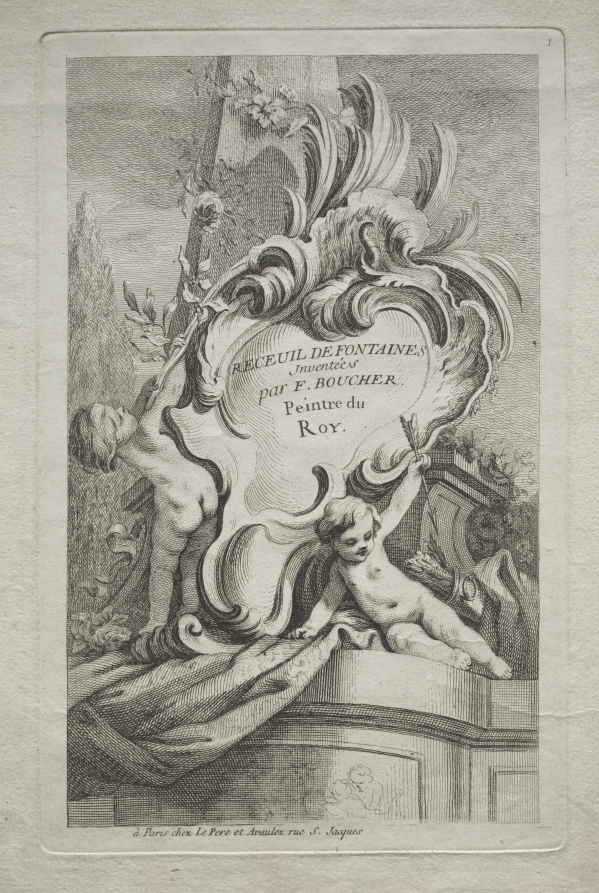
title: No. 1: Title Page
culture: France, 18th century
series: Book of Fountains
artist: Gabriel Huquier (French, 1695–1772)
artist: after François Boucher (French, 1703–1770)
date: c. 1736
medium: etching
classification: Print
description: Boucher was one of the most prolific designers of ornament prints. With their aquatic motifs and gracefully curving and scalloped forms, these designs for fantastic, even bizarre fountains perfectly illustrate the whimsical Rococo approach. Derived from the French word for shell, rocaille, the Rococo was a light, playful style filled with shell motifs (which stemmed in part from a vogue for collecting shells), naturalistic curves, scrolls, and plant forms.